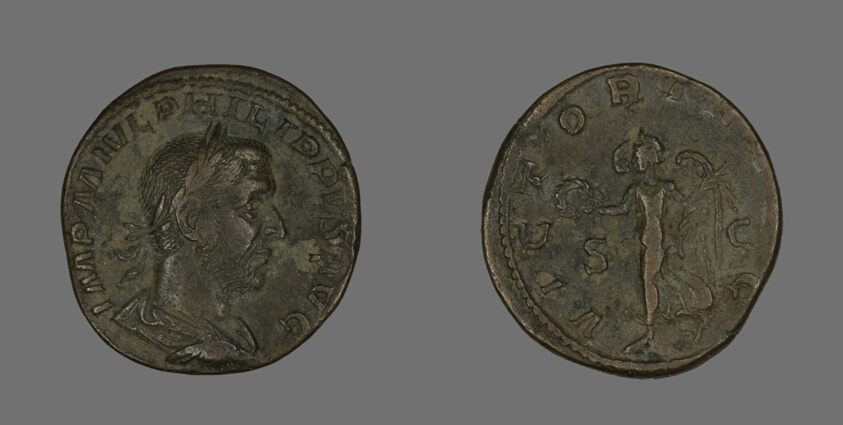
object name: Coin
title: Sestertius (Coin) Portraying Philip the Arab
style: roman (ancient, style or period), ancient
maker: Roman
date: 244-247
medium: Bronze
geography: Roman Empire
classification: coin; ancient art